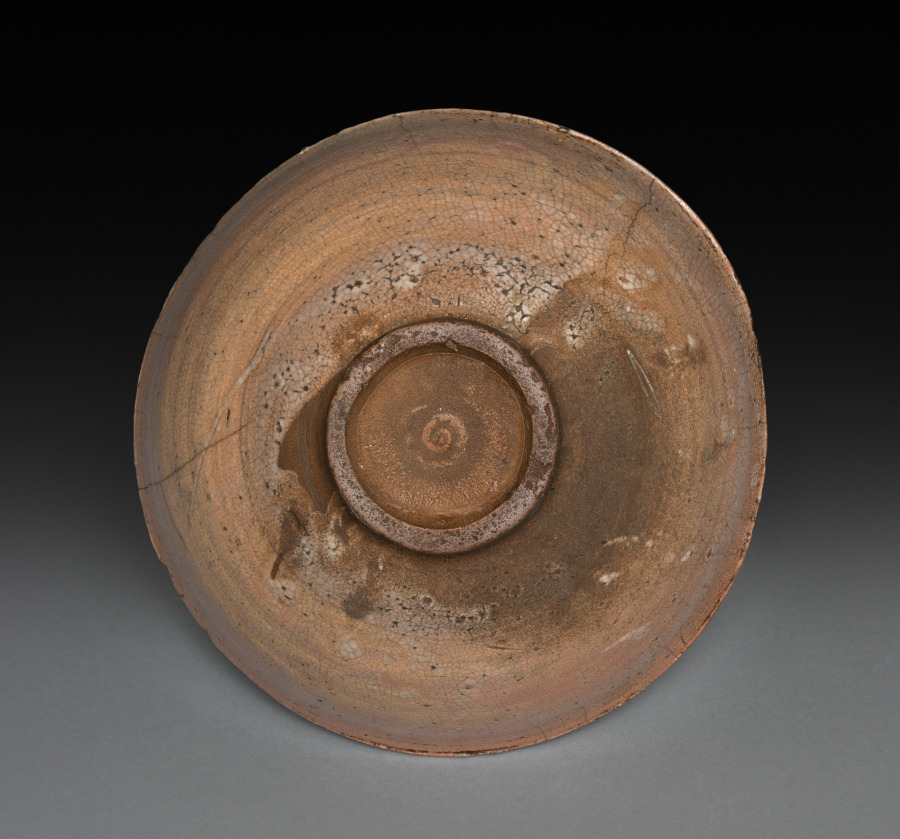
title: Tea Bowl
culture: Japan, Momoyama period (1573–1615)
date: c. 1600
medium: Glazed stoneware (Karatsu ware)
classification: Ceramic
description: Wide-mouthed bowls were used for consuming whipped tea such as that imbibed during the tea ceremony. Karatsu ware like this was among the most prized of such tea bowls. The port city of Karatsu in Saga prefecture in Kyushu was known for its kilns that produced high-fired, Korean-style glazed pottery. The Japanese ruler Toyotomi Hideyoshi invaded Korea in 1592 and 1597, returning with families of Korean potters as spoils of war. This region was one of the sites where these potters were resettled.